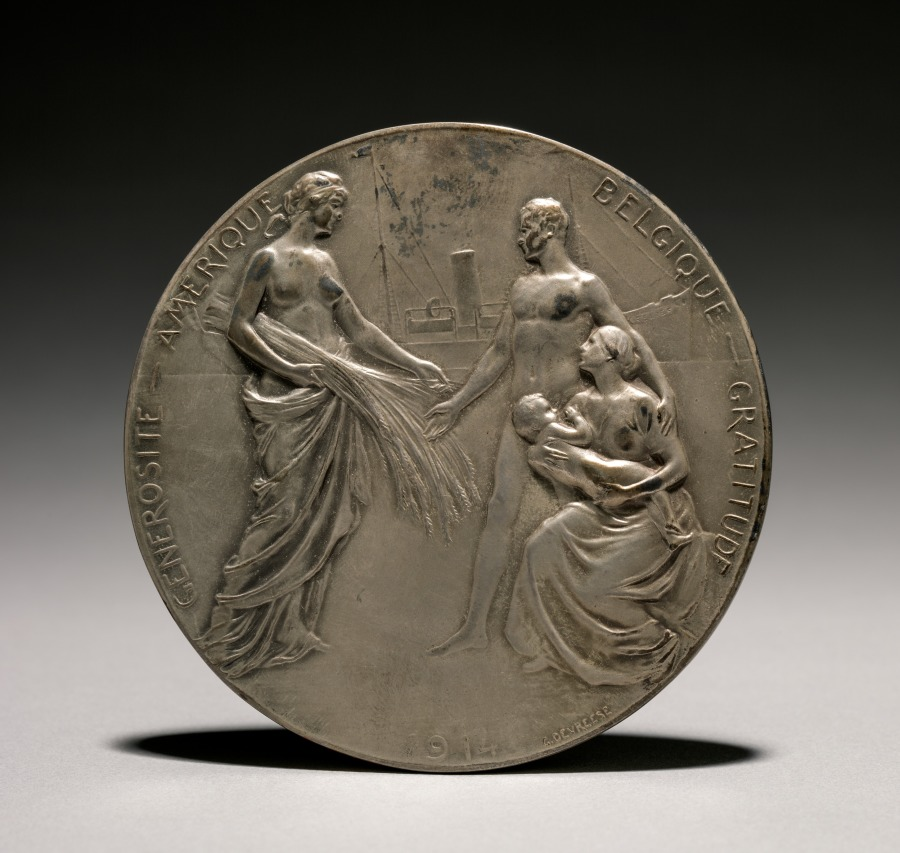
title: Medal (reverse)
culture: Belgium, early 20th century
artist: Godefroid Devreese (Belgian, 1861–1941)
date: 1914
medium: bronze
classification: Metalwork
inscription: "Generosite -- Amerique. Belgique -- Gratitude"; signed: "1914 G. Devreese."